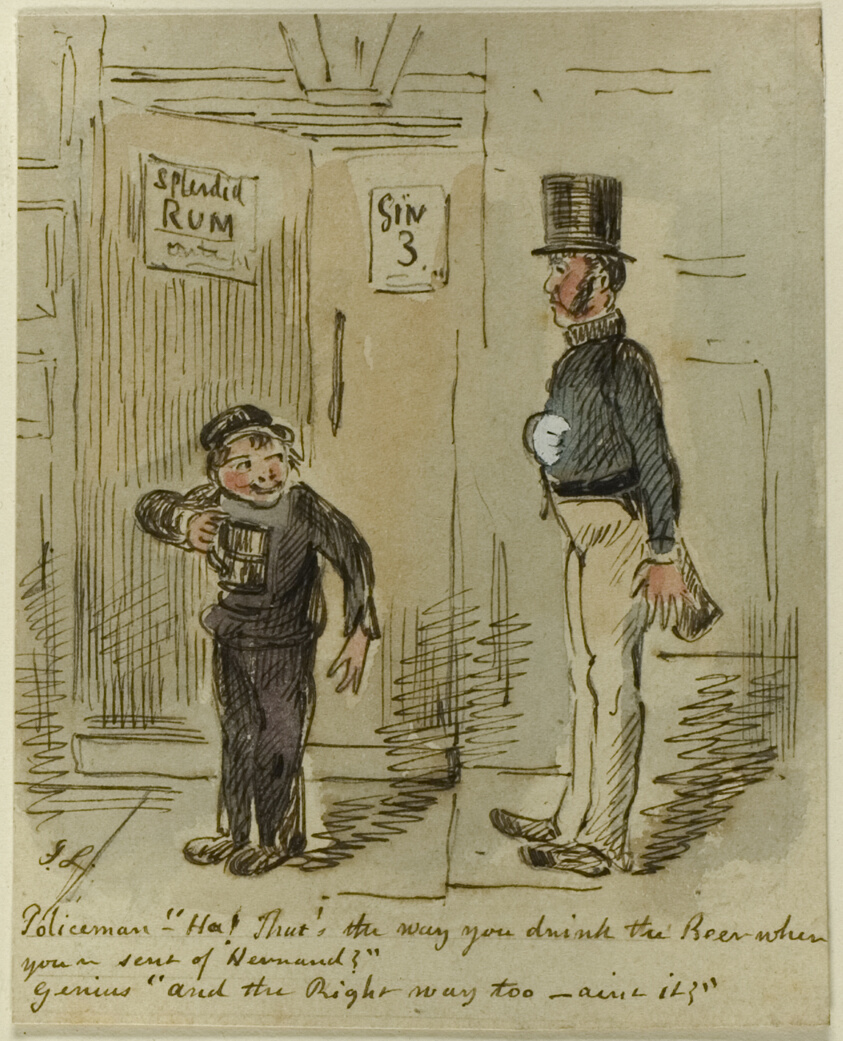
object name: Drawing and Watercolor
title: Policeman and Boy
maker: John Leech (English, 1817-1864)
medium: Watercolor and pen and brown ink, with touches of white gouache, over graphite, on cream wove paper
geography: England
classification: watercolor; drawings (visual works); prints and drawing